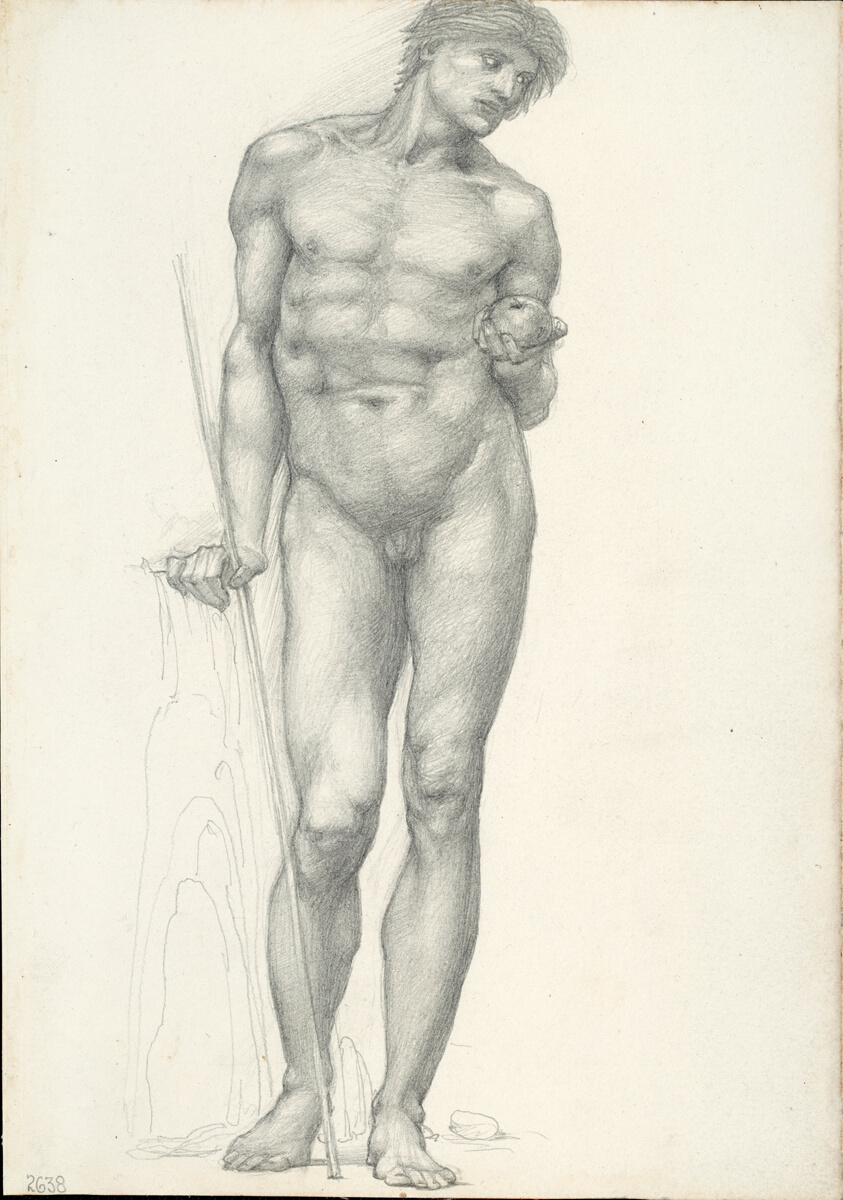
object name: Drawing and Watercolor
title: Paris with Golden Apple in Left Hand, for the Troy Triptych (sketchbook #2638)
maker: Sir Edward Burne-Jones (English, 1833-1898)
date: c. 1873–77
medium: Graphite on ivory wove paper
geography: England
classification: graphite; drawings (visual works); prints and drawing